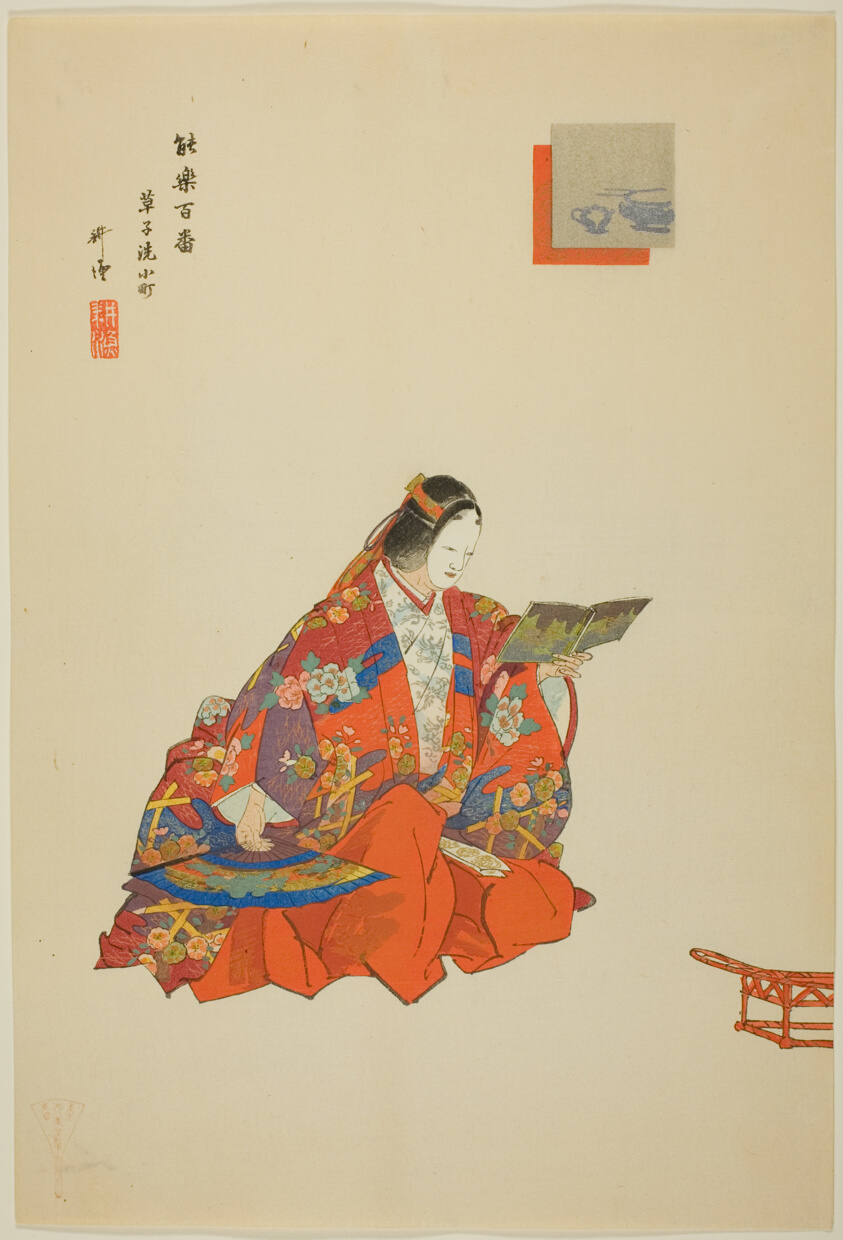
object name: Print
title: Soshi-arai Komachi, from the series "One Hundred No Dramas (Nogaku hyakuban)"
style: Japanese (culture or style)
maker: Tsukioka Kogyo; Japanese, 1869-1927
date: 1898/1903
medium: Color woodblock print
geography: Japan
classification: woodblock print; print; asian art